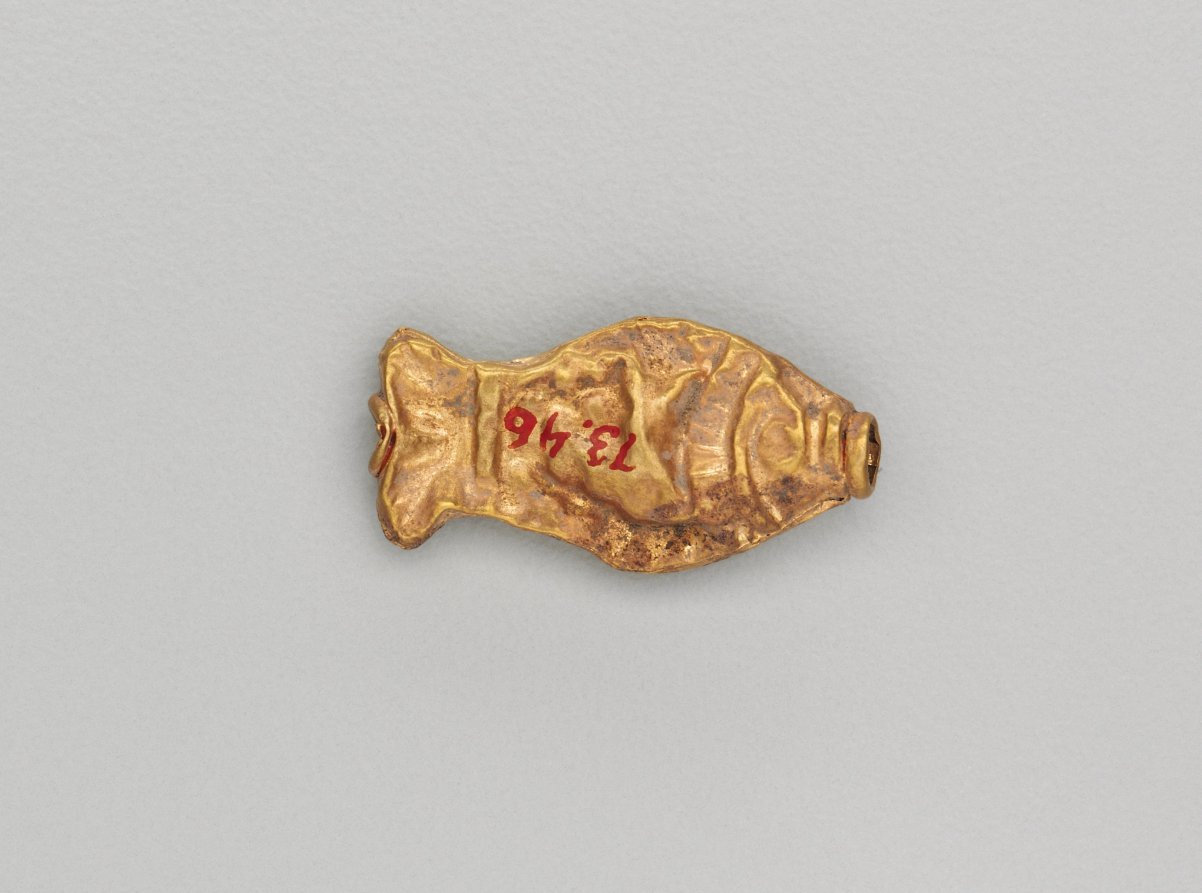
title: Necklace Bead in the Form of a Fish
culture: India, Shunga period (185–78 BCE)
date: 185–72 BCE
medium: gold repoussé with granulation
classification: Jewelry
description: Jewelry in ancient India often consisted of elements associated with water, such as fish and other aquatic plants and animals. Since water is essential for life, imagery that connotes water is life-affirming, or auspicious, and therefore appropriate adornment.